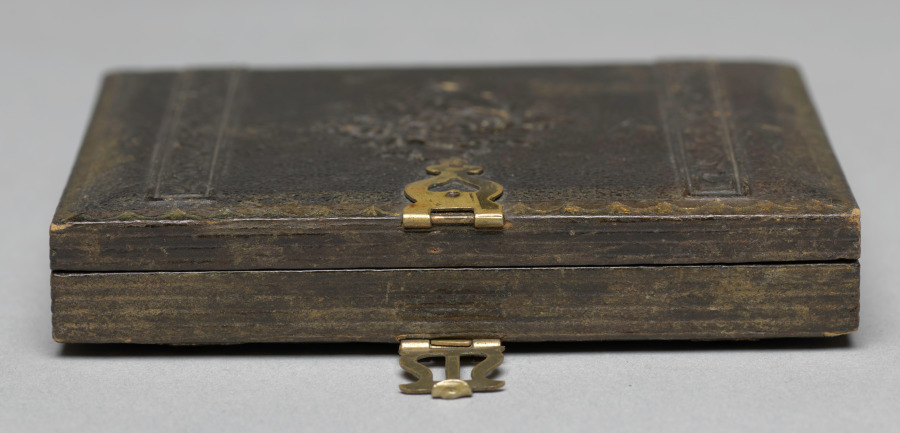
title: Poodle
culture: America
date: c. 1861–63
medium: ambrotype, tinted, sixth plate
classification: Photograph